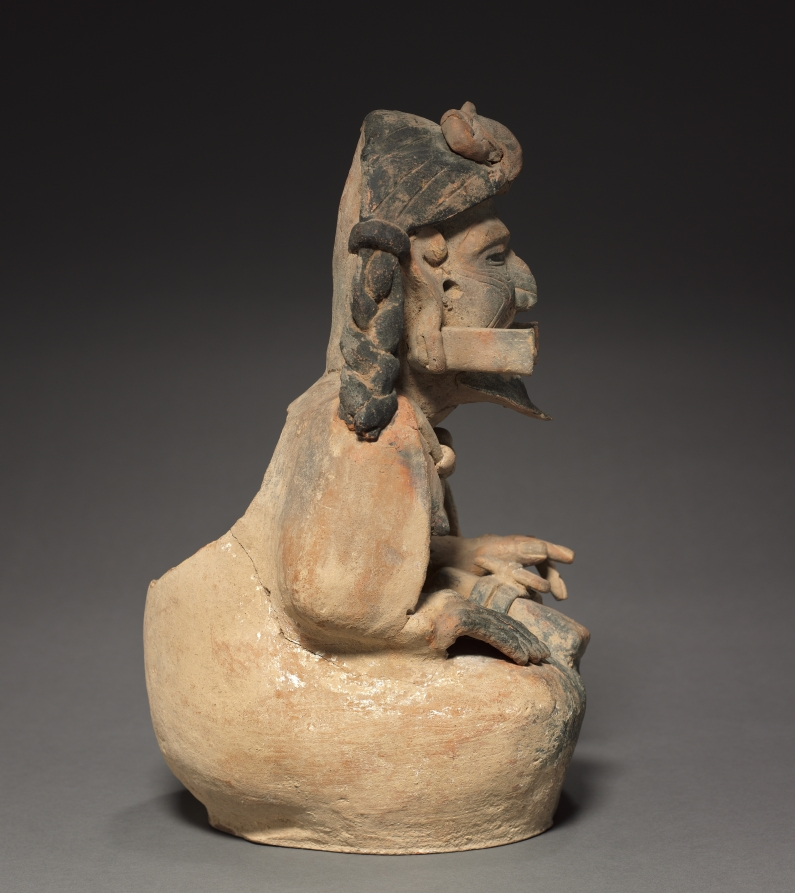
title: Elderly Figure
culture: Mexico, Campeche, Veracruz Monumental Sculpture Type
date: 600–900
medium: molded and modeled pottery with gray, tan and black paint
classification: Sculpture